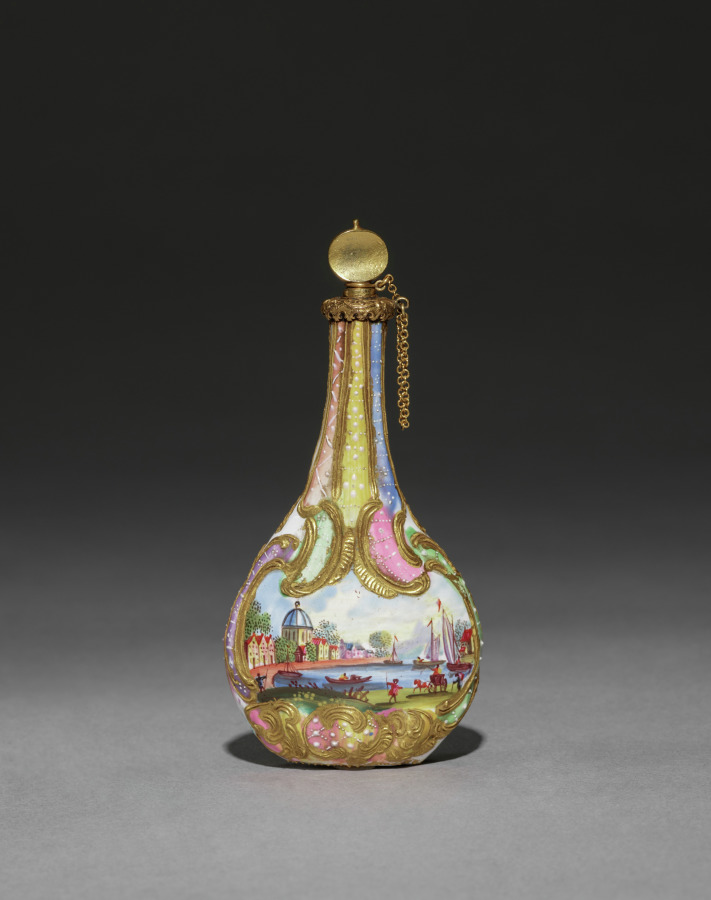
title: Scent Bottle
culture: England, Staffordshire, 18th century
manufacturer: Staffordshire Factory (British)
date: 1700s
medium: enamel on copper with metal mounts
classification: Miscellaneous